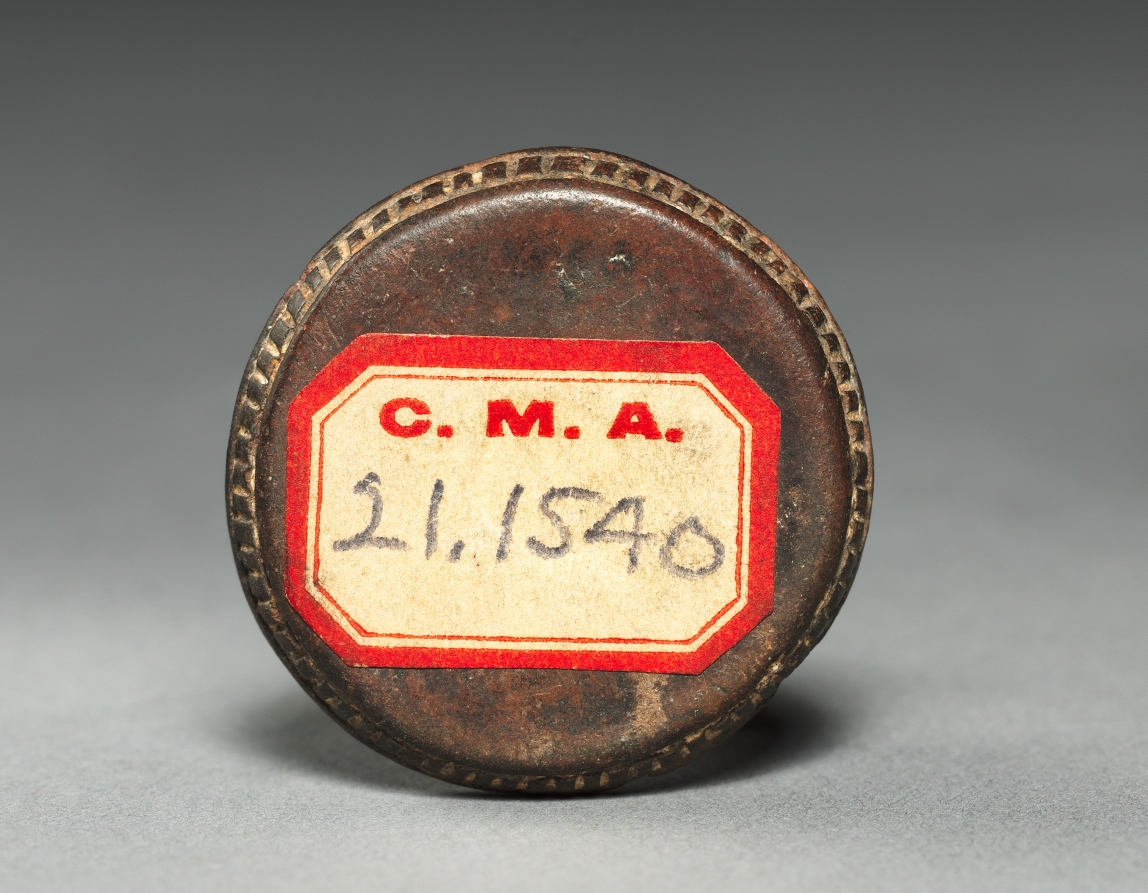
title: Button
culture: Colombia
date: before 1921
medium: black ware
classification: Ceramic